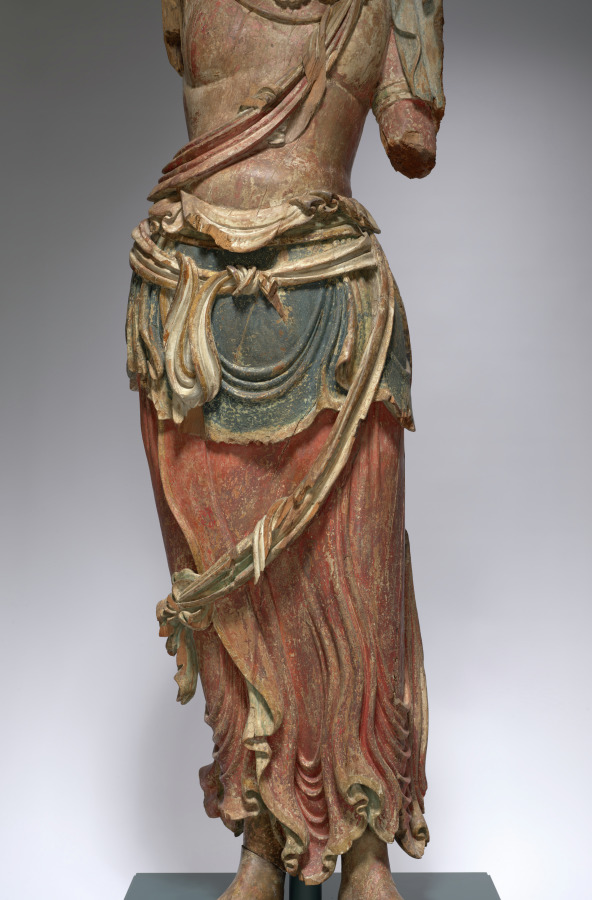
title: Eleven-Headed Guanyin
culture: China, late Northern Song dynasty (960-1127) - Jin dynasty (1115-1234)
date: 1100–1200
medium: wood with polychromy and cut gold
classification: Sculpture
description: The bodhisattva is an enlightened being dedicated to the spiritual awakening of all beings. The compassionate bodhisattva Guanyin, in a variety of manifestations, is probably the most popular deity of worship in Chinese Buddhism. In the Esoteric Buddhist form shown here, this standing Guanyin has a total of eleven heads, with smaller ones above the principal head. The uppermost head represents the Buddha Amitabha, to whom he is closely related. The eleven heads symbolize the Buddha’s steps on the path to enlightenment.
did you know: This Guanyin is carved from a single block of willow (genus Salix sp.).